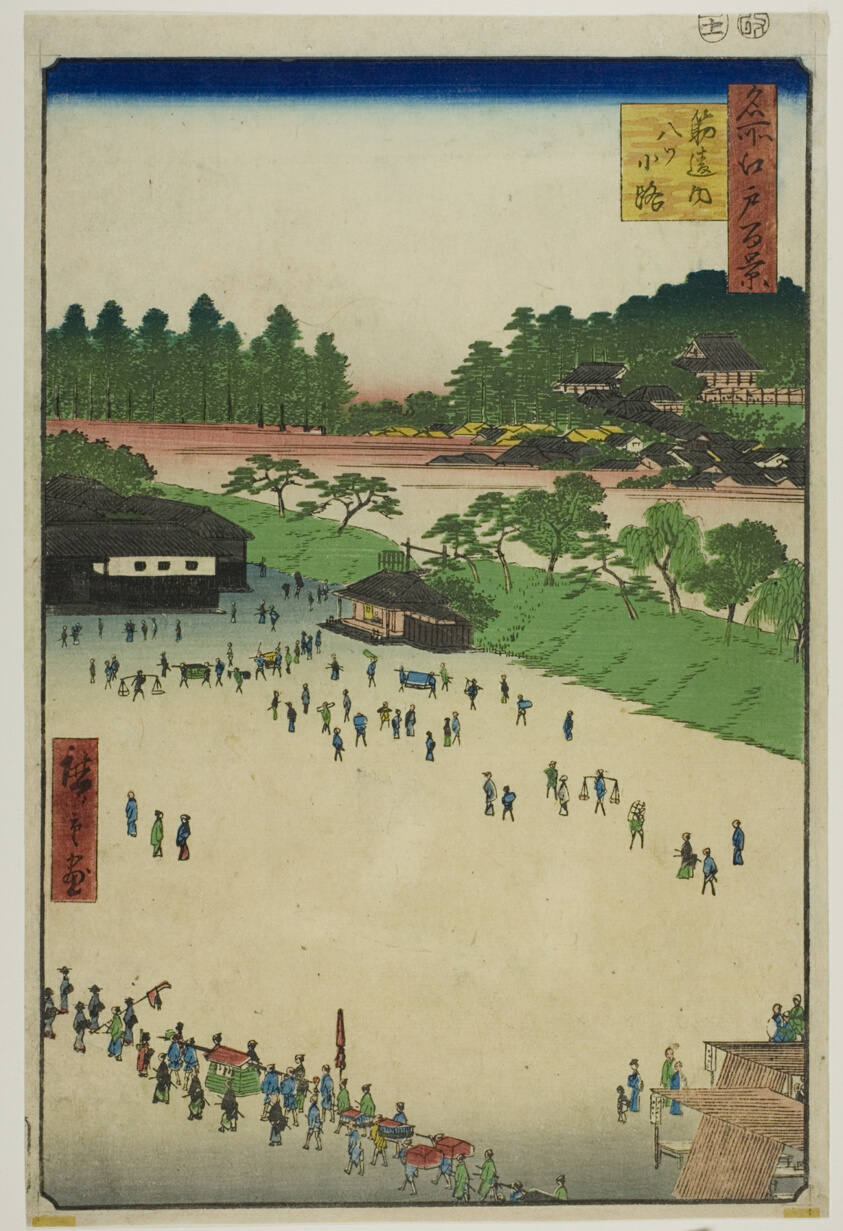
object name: Print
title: Yastukoji, Inside Sujikai Gate (Sujikai-uchi Yatsukoji), from the series “One Hundred Famous Views of Edo (Meisho Edo hyakkei)”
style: Japanese (culture or style)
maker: Utagawa Hiroshige 歌川 広重; Japanese, 1797–1858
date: 1857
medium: Color woodblock print; oban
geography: Japan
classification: woodblock print; print